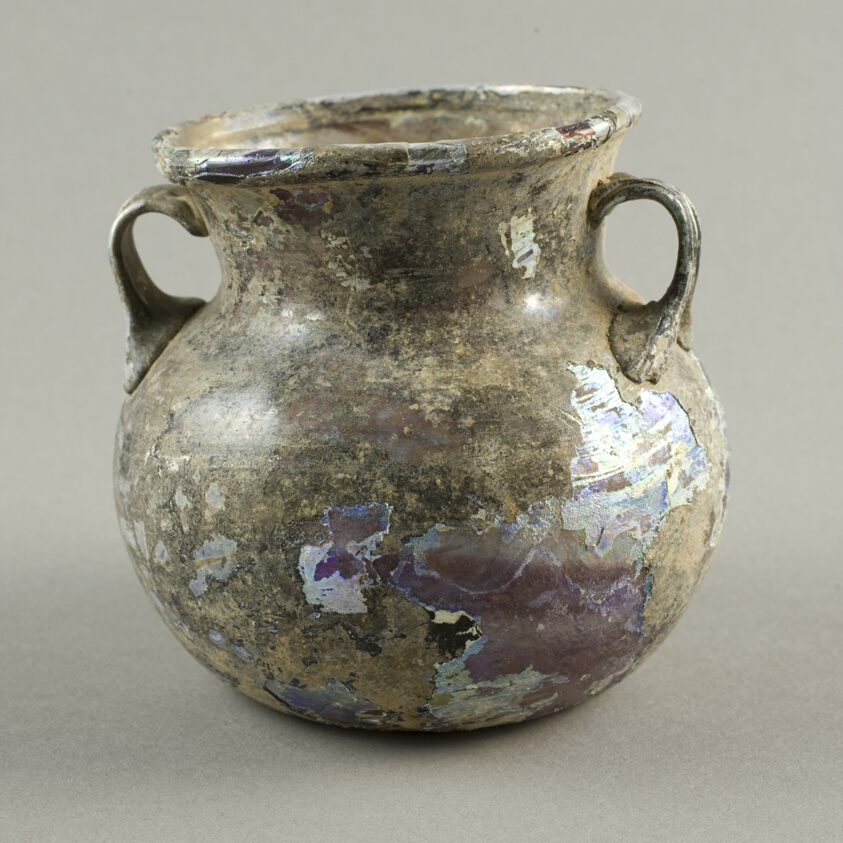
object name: Vessel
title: Jar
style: syrian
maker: Roman; Levant or Syria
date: 2nd-3rd century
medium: Glass, blown technique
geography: Syria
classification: glass; vessel; ancient art